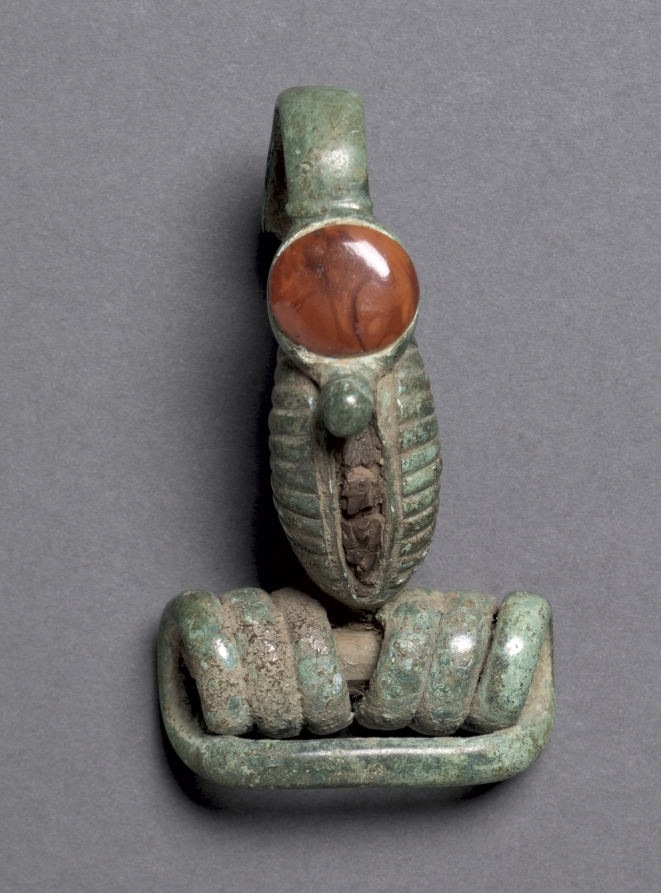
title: Fibula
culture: Classical, Poland (?)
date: 450–1 BCE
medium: bronze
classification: Jewelry